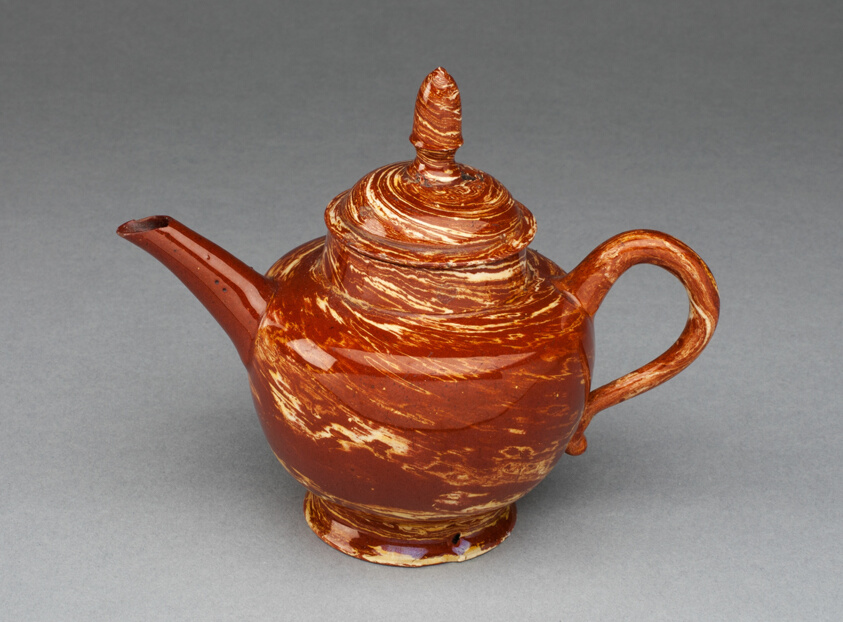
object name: Ceramics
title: Teapot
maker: Staffordshire, England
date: c. 1755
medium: Lead-glazed earthenware (agateware)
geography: Staffordshire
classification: teapot; earthenware; lead-glazed earthenware; agateware; ceramics; european decorative arts